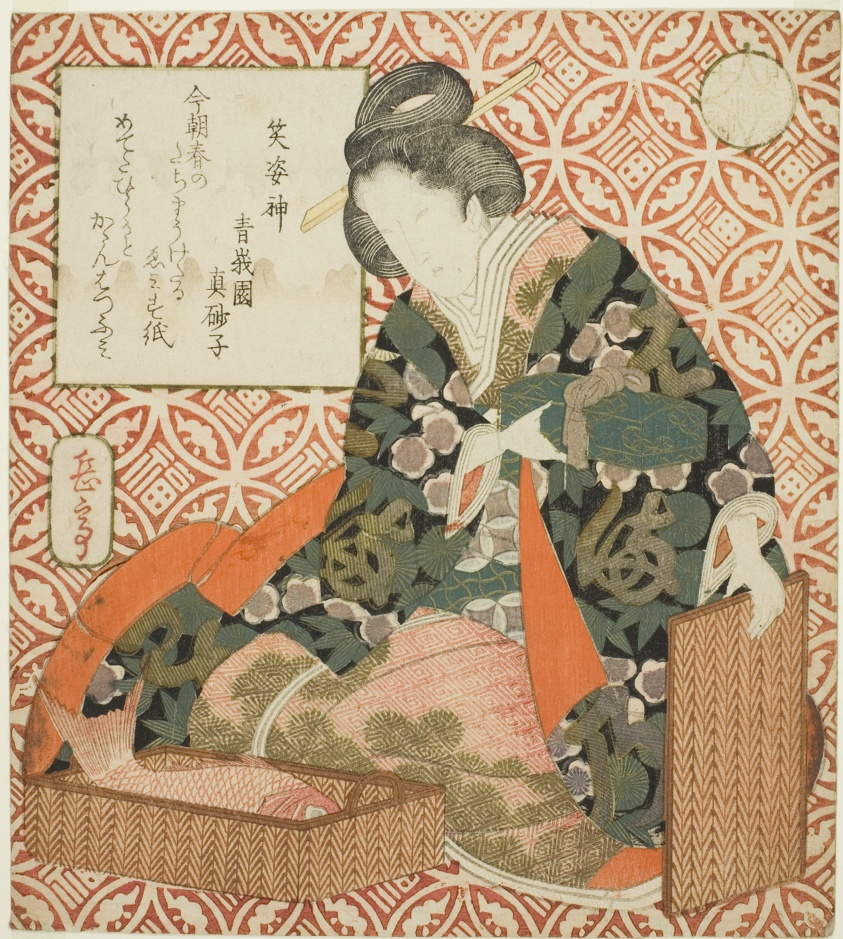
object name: Print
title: Ebisu (Shobishin), from the series "A Parody of the Seven Gods of Good Fortune (Mitate shichifukujin)"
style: Japanese (culture or style)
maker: Yashima Gakutei (Japanese, 1786 (?)-1868)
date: c. 1828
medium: Color woodblock print; shikishiban, surimono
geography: Japan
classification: woodblock print; print; asian art